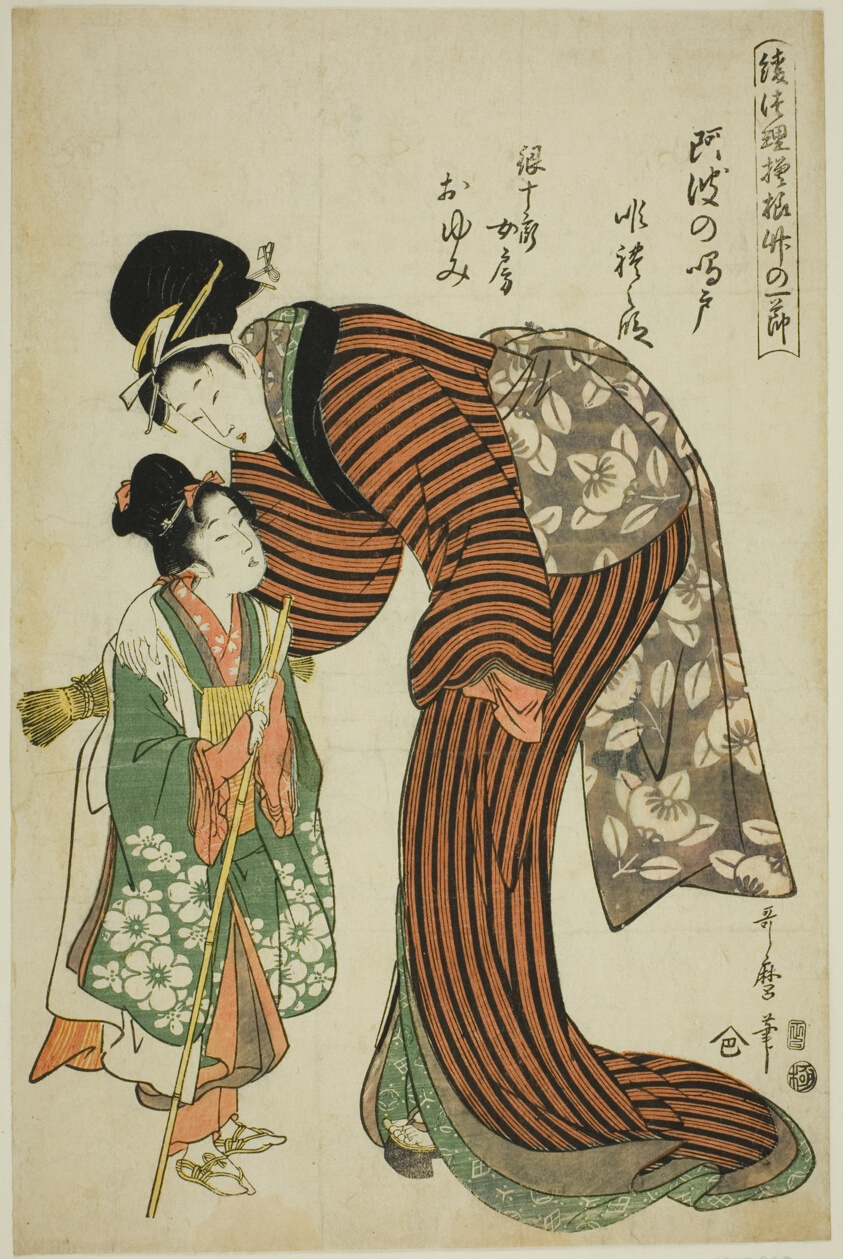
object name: Print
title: Ginjuro's Wife Oyumi from the Play "Whirlpools of Awa" (Awa no naruto, Ginjuro nyobo Oyumi), from the series "Bamboo Nodes in Puppet Theater Designs (Ayatsuri moyo take no hitofushi)"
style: Japanese (culture or style)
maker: Kitagawa Utamaro 喜多川 歌麿; Japanese, 1753 (?)-1806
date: 1806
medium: Color woodblock print; oban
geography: Japan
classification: woodblock print; print; asian art